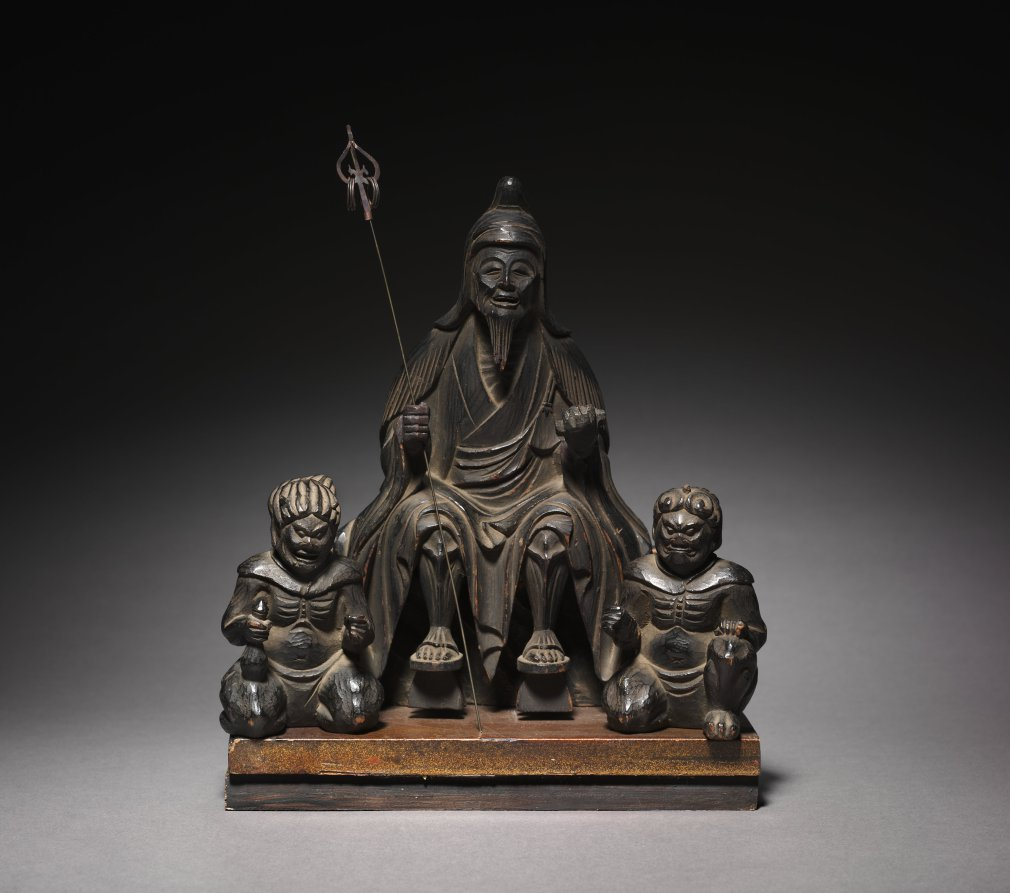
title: En no Gyōja with Zenki and Kōki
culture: Japan, Edo period (1615–1868)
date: 1615–1868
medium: wood with paint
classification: Sculpture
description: This trio of figures, identified as Enno Gyoja and his two attendants, Zenki and Kōki, follows the iconography of Shugendo, the traditional mountain ascetic practice in Japan. Enno Gyoja is depicted as a hermit-monk, seated on a rock attached to a modern base. He holds a staff in his right hand and a sutra in the left. The two attendants take the form of half-human, half-demonic figures and are regarded as a married couple. Kōki carries a sake bottle.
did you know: These figures' miniaturized format allowed them to be portable devotional statuettes that worshipers could carry as they traveled.